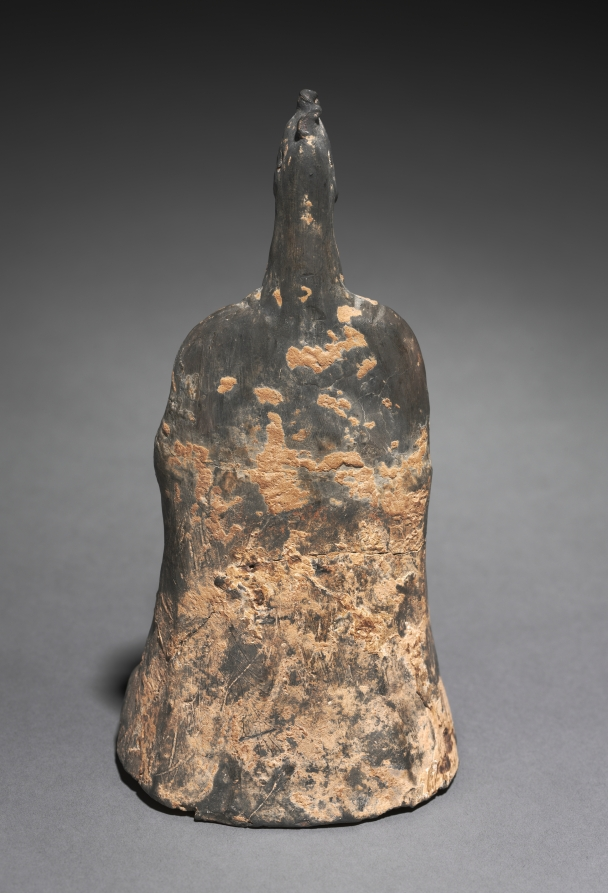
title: Mortuary Figure of the Zodiac Sign: Cock (Capricorn)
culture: China, Northern Wei dynasty (386-534)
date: 500s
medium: gray earthenware with traces of slip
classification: Sculpture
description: The twelve-animal zodiac series—rat, ox, tiger, rabbit, dragon, snake, horse, goat, monkey, rooster, dog, and boar—signifies a traditional Chinese concept of time structured in a cyclical order. The twelve animals are also linked to the art of fortune-telling that underlies human existence in connection with the changes of the universe. The use of the twelve zodiac animals as tomb furniture suggests they provided a cosmological structure for the afterlife.